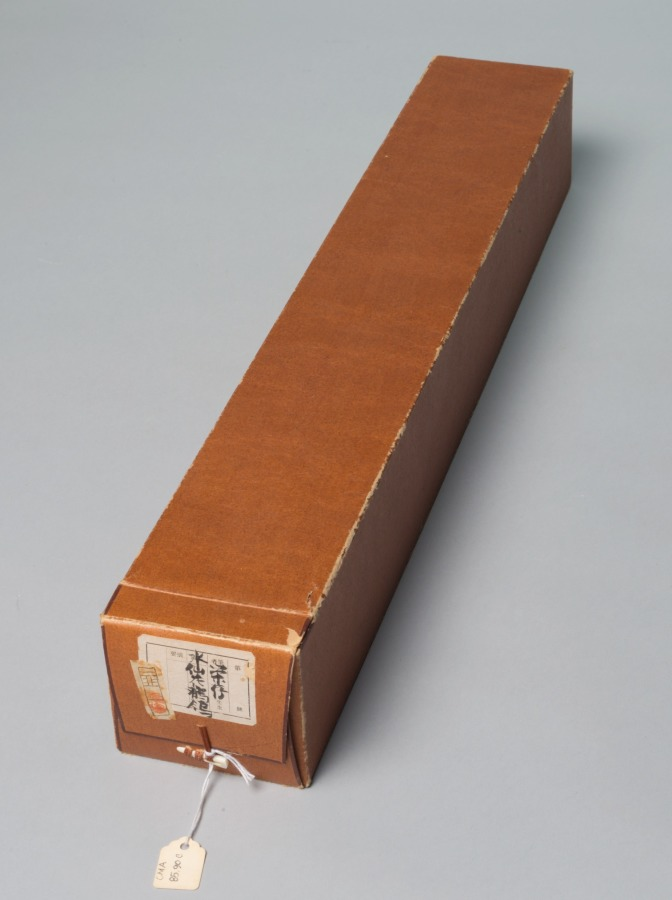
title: Wagtails and Narcissus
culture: Japan, Muromachi period (1392–1573)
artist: Eison (Japanese)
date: mid-1500s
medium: hanging scroll; ink on paper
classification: Painting